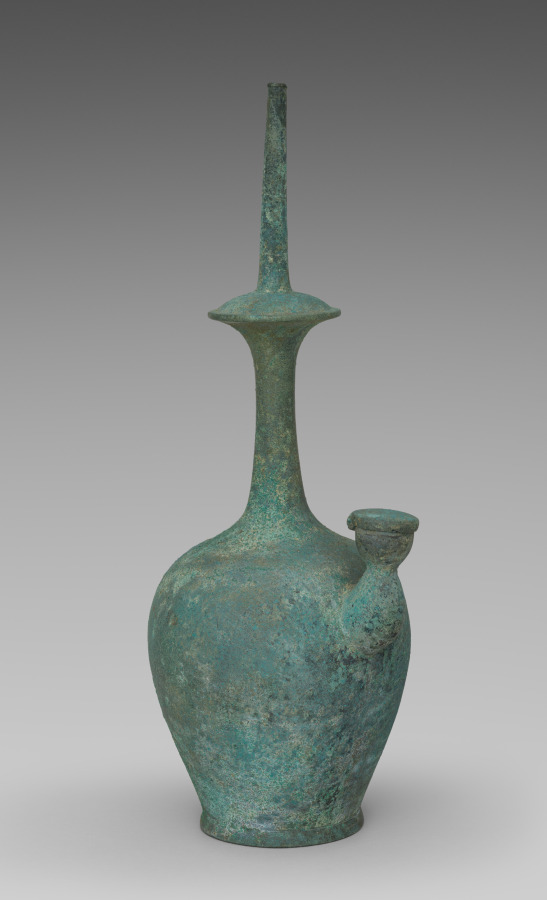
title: Water Ewer for Rituals (Kundika)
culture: Korea, Goryeo dynasty (918–1392)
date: 1100s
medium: bronze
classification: Metalwork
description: Known as kundika in Sanskrit, this distinctively shaped vessel served to purify a sacred space and to invoke a deity. In Korean Buddhist art, it appears primarily as an attribute of the Bodhisattva Avalokitesvara (Gwaneum in Korean). By the 1100s, however, the kundika was used as aristocrats’ fancy water container for everyday use.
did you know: This distinctively shaped vessel is called a kundika in Sanskrit, simply referring to a water bottle.